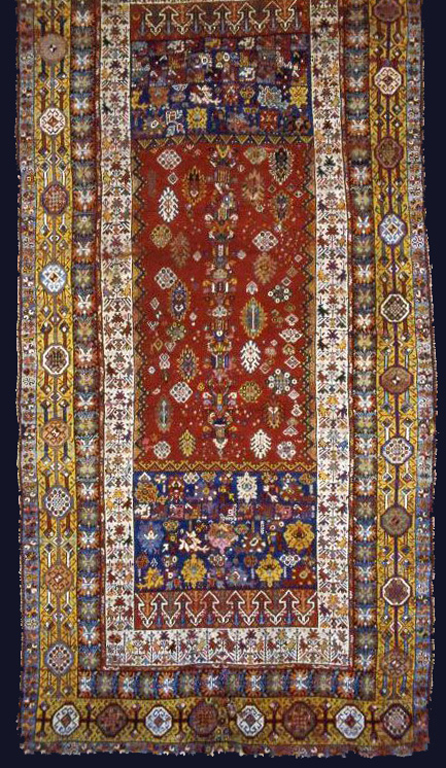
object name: Textile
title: Carpet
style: rabat, african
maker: Morocco, Rabat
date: 1875–1900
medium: Wool, plain weave with supplementary wrapping wefts forming cut pile through a technique known as "Turkish" (Ghiordes) knots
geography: Morocco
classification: weaving - carpet; weaving; textile